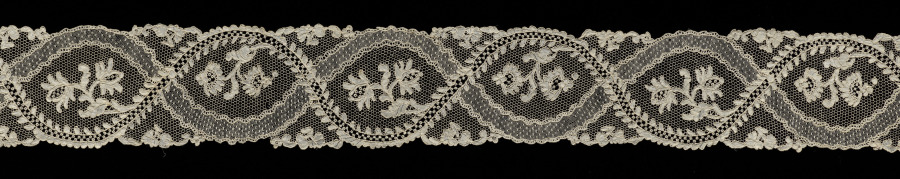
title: Lace Lappet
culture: France, Argentan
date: 1715–74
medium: Linen: needle lace (Point de Argentan)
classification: Lace